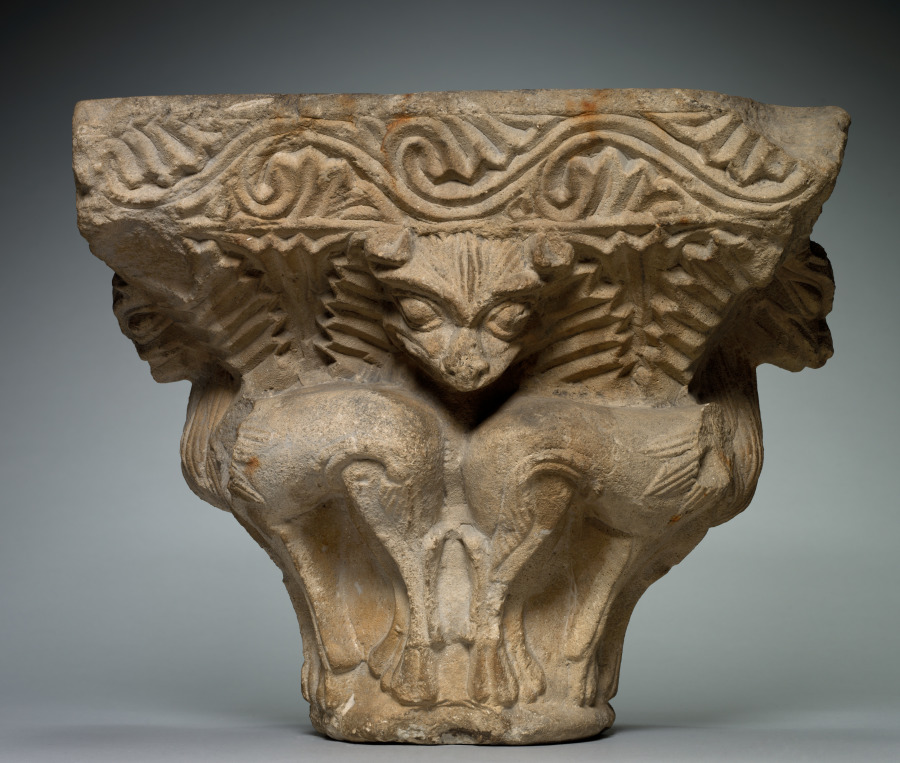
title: Capital with Addorsed Quadrupeds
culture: Southwest France, Languedoc, Toulouse (?), late 12th to early13th Centuries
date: late 1100s-early 1200s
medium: limestone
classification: Sculpture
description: Monstrous images were prevalent in the decoration of religious buildings during the Middle Ages. Such images must have impressed, perhaps even terrified, the monks and visitors who spent much of their time within the cloister or church, a place of prayer, contemplation, and reflection. Scholars have speculated how such images would have been received by the people given the ubiquity of monsters in medieval society. The carved monsters, often symbolizing vice and retribution for sin, were possibly designed to provoke a range of emotional responses including laughter, wonder, surprise, fear, and shock. This striking imagery must have had a strong impact, which in turn led Saint Bernard of Clairvaux (1090–1153), the spiritual head of the Cistercian order, to admonish their use as distracting from prayer.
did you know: A quadruped is an animal with four feet; the specific animal shown here is unidentified.